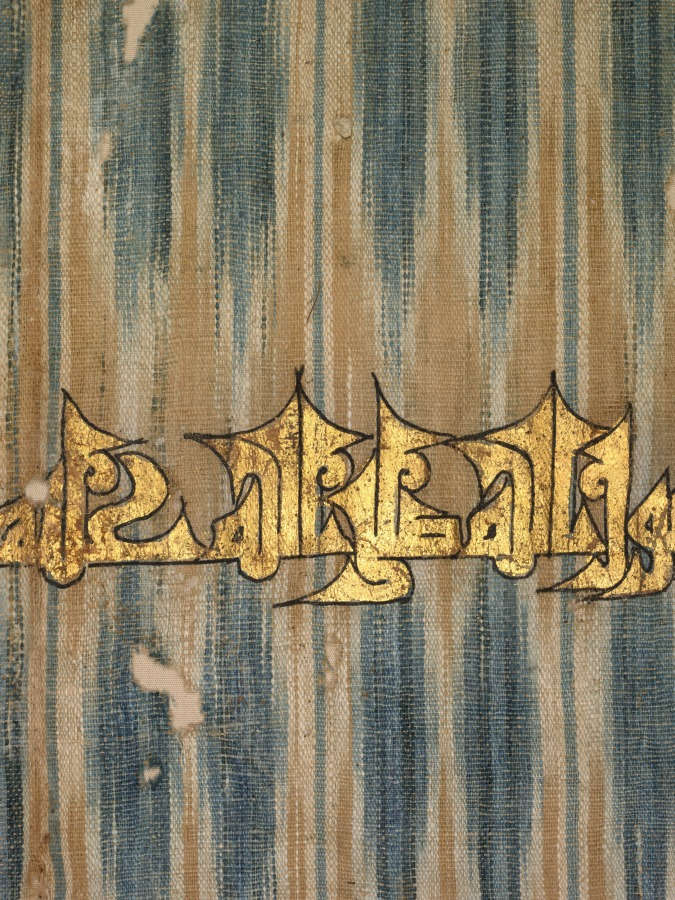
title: Ikat tiraz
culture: Yemen, San'a', Zaydi Imam period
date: 960–80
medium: resist-dyed warp (ikat); plain weave with inscription: cotton and gold leaf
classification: Textile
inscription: Kufic inscription, translated as: ". . . [a]l-Dá'i ilá al-Haqq, Commander of the Believers, Yusuf b. Yahya b. al-Nasir li-Din Allah Ahmad, son of the apostle of God, may God bless them all." At the bottom, the word "to God" is inverted. "Yusuf ibn Yahya" ruled AD 968-998)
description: The "flame" pattern was dyed on the vertical warp threads before weaving began by tightly binding them to resist dye penetration, and repeated for each color. The process and fabric are called ikat, a Malaysian word which may have originated in South Arabia. Yemeni ikats with historical Arabic inscriptions from the 10th century are among the oldest known. This text, written in Kufic script with gold leaf outlined in black, identifies a ruler of the Yemen: ". . . [a]l-Da’i ila al-Haqq, Commander of the Believers, Yusuf b. Yahya b. al-Nasir li-Din Allah Ahmad, son of the apostle of God, may God bless the all." The Arabic phrase "to God" is inverted at the bottom.